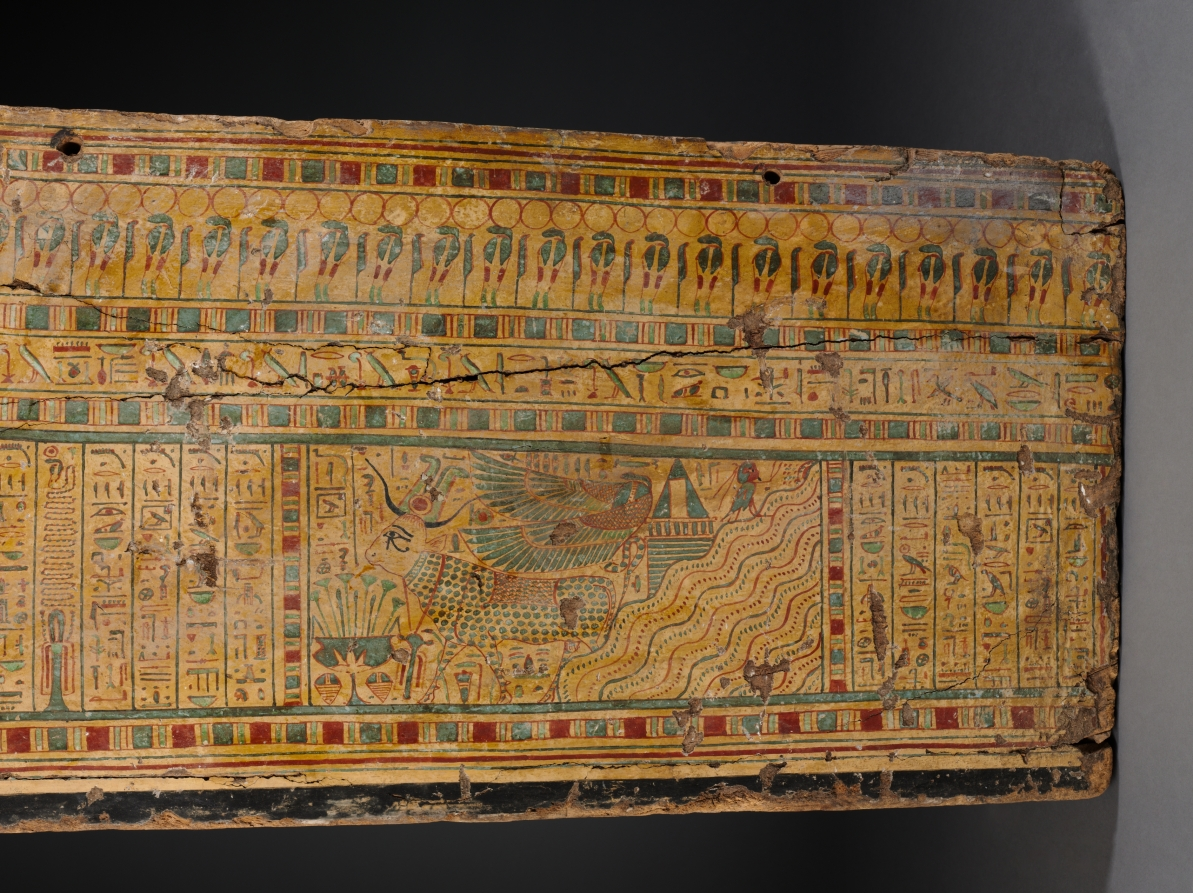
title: Coffin of Nesykhonsu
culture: Egypt, Thebes, Third Intermediate (1069–715 BCE), Dynasties 21–22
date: c. 976–889 BCE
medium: gessoed and painted sycamore fig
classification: Funerary Equipment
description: Egyptian coffins told stories and illustrated spells to help the deceased transition safely to the afterlife. Inside Nesykhonsu's coffin there are two jackals, one facing right and the other left, near the top. Here, the jackal represents the powerful deity Anubis, the god of the afterlife and embalming.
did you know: Two of Nesykhonsu's titles, "Lady of the House" and "Singer of the Choir of Mut the Great," are written on the outside of the coffin.